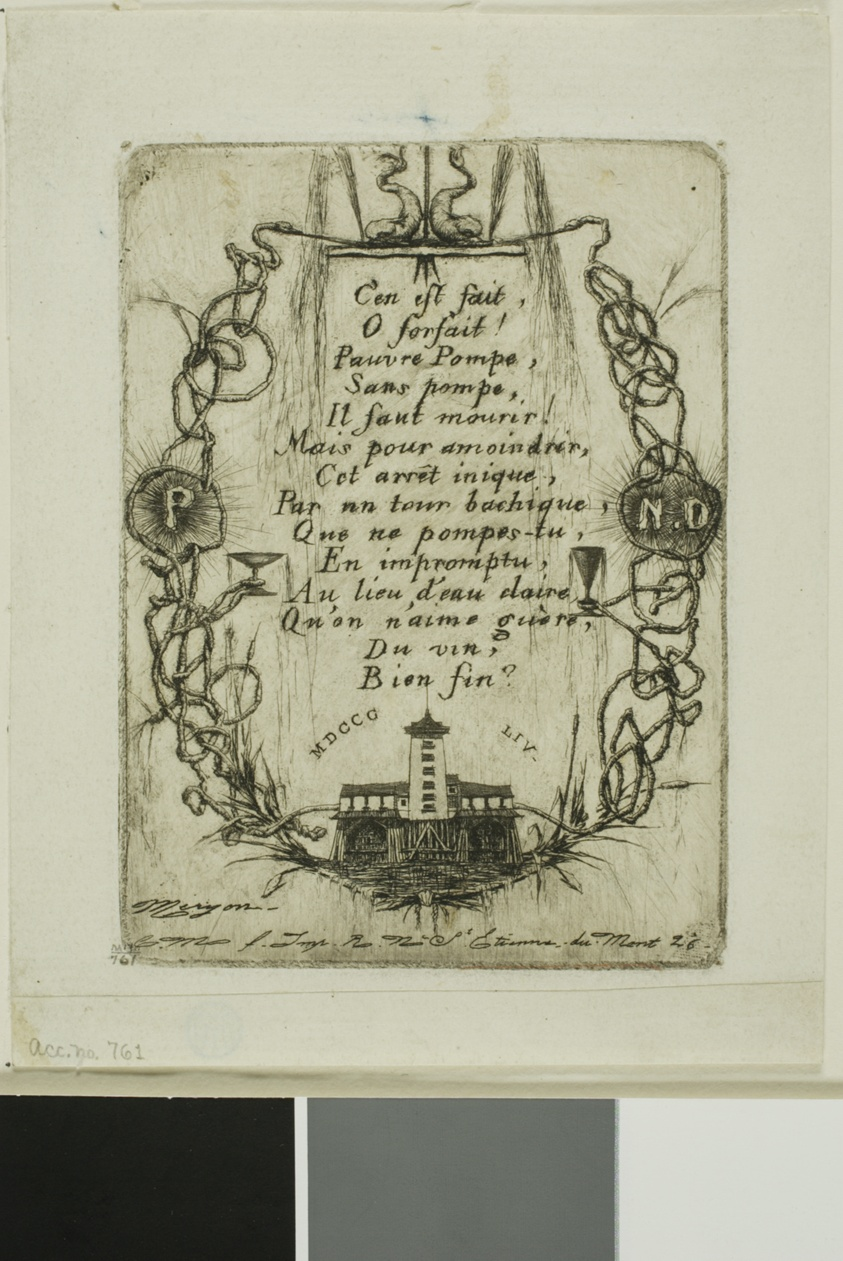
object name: Print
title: Pompe Notre-Dame, Paris, small plate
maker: Charles Meryon (French, 1821-1868)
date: 1854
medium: Etching on ivory laid paper, with ivory laid paper affixed at bottom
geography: France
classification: etching; print; prints and drawing